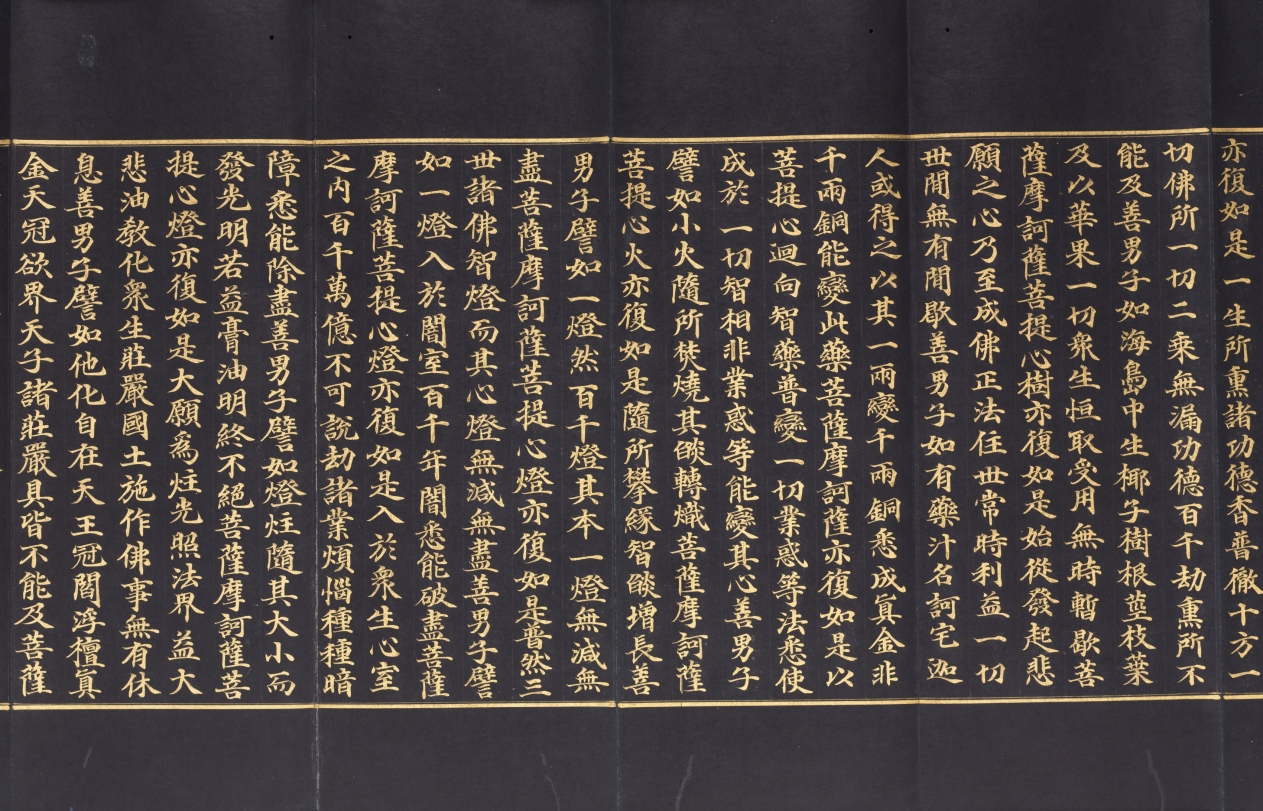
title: Avatamsaka Sutra No. 78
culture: Korea, Goryeo dynasty (918–1392)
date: 1300s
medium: Folded book with illustrated frontispiece; gold and silver on mulberry paper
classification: Bound Volume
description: This illuminated manuscript presents one part of the multivolume sacred text titled Avatamsaka (Flower Garland) sutra. Both the script and the image are rendered in gold ink on the smooth surface of the dark blue, indigo-dyed mulberry paper. This portion of the text, which reads from right to left, describes the encounter of the Buddha of the Future (Maitreya) and the young pilgrim Sudhana. The Buddha gives his words of wisdom to Sudhana, who asks questions about the path toward spiritual awakening. Mixed with ink and glue, the gold has a brilliance that strikingly reflects Sudhana’s ardent quest for understanding the way to reach enlightenment.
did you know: The pristine condition of this manuscript indicates that it was rarely used after its creation, revealing that the act of making a manuscript rather than reading it was the main religious goal.